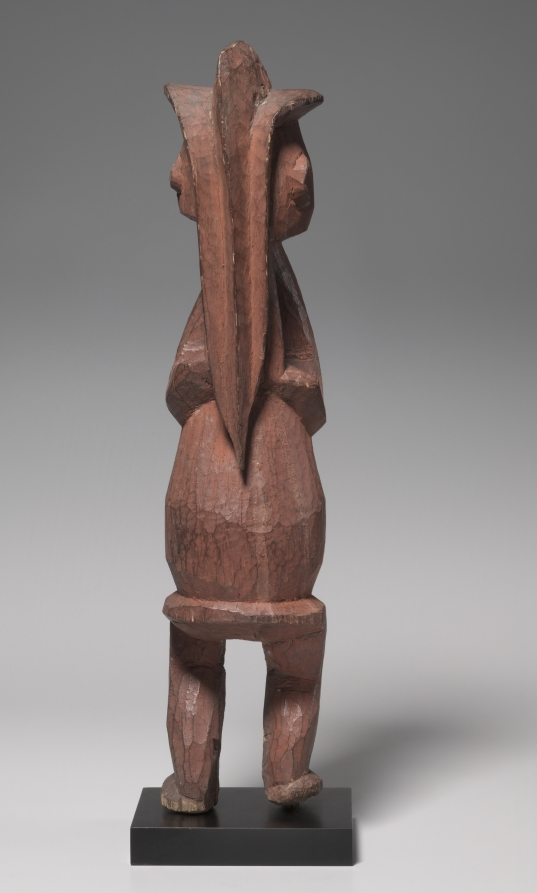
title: Male Figure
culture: Africa, Central Africa, Democratic Republic of Congo, Hungaan-style maker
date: mid- to late 1800s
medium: Wood and colorant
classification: Sculpture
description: Hungaan figures of this size served as guardians of ritual shrines and functioned in rituals to promote fertility, guarantee well-being, and ensure longevity. The striking crested hairstyle imitates a real coiffure or a wig, indicative of status and prestige. The hands supporting the chin identify the figure as a chief who is immersed in thought and contemplation, pondering over his responsibilities.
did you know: The red powdery surface of this figure mimics a red body adornment that mixed ground camwood with palm oil.